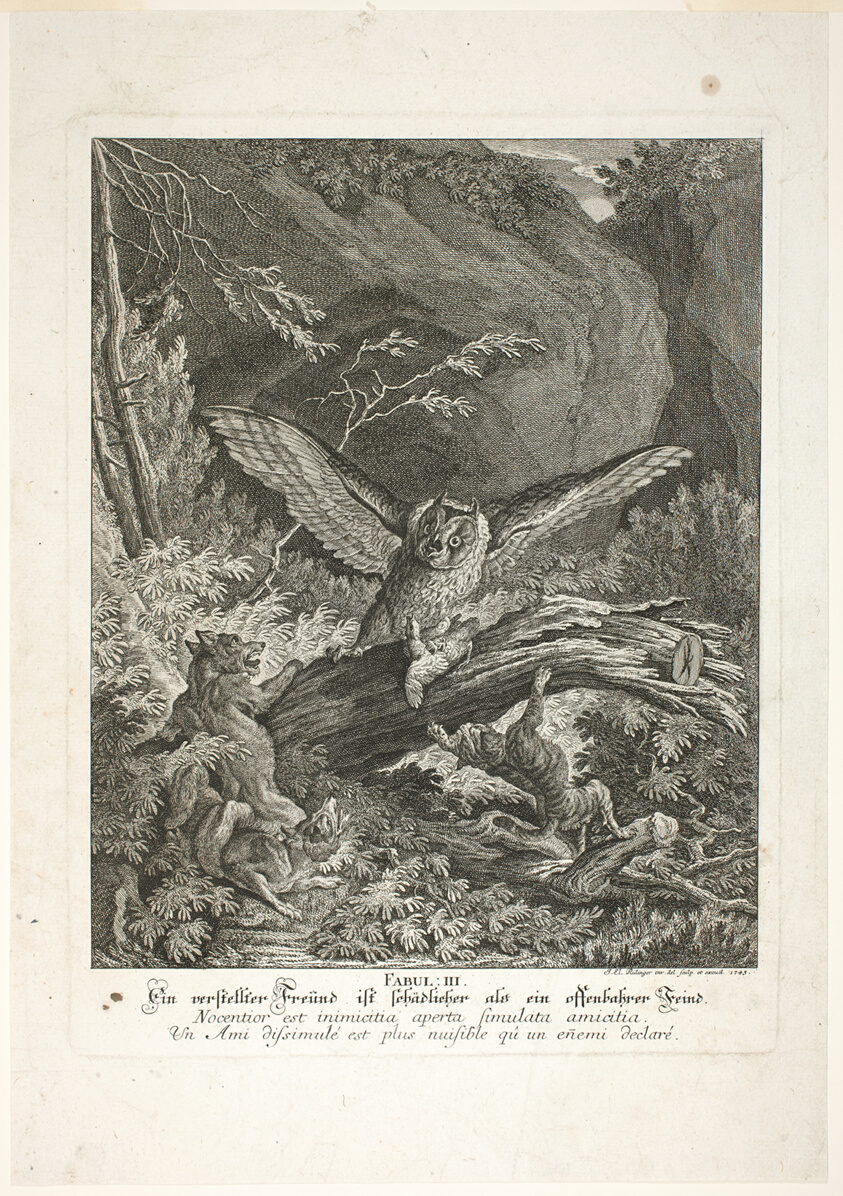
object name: Print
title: Fable III, plate three from Lehrreiche Fabeln aus dem Reiche der Theire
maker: Johann Elias Ridinger (German, 1698-1767)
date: 1743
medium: Etching on ivory laid paper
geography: Germany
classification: etching; print; prints and drawing